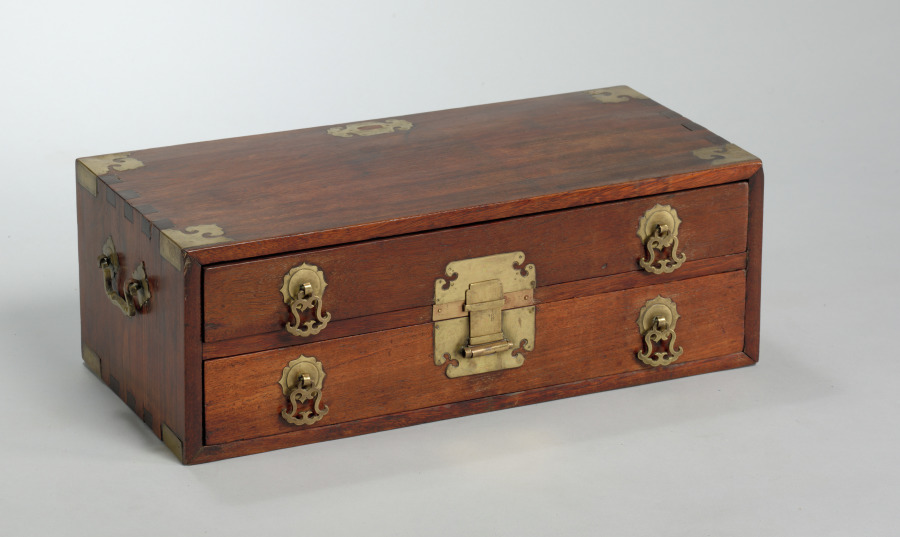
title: Small Oblong Two-Drawer Chest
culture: China, Qing dynasty (1644-1911)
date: 1800s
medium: Chicken-wing wood (jichimu)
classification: Furniture and woodwork